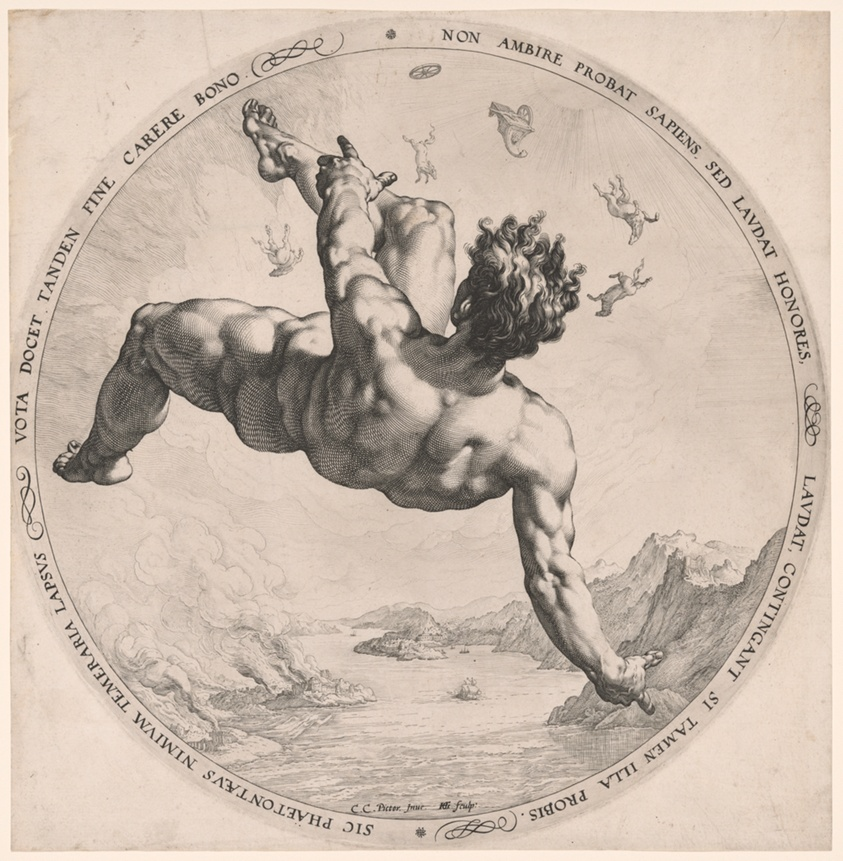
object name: Print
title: Phaeton, from The Four Disgracers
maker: Hendrick Goltzius (Dutch, 1558–1617); after Cornelis van Haarlem (Dutch, 1562–1638)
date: 1588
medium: Engraving on ivory laid paper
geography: Netherlands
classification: print; paper; prints and drawing; engraving